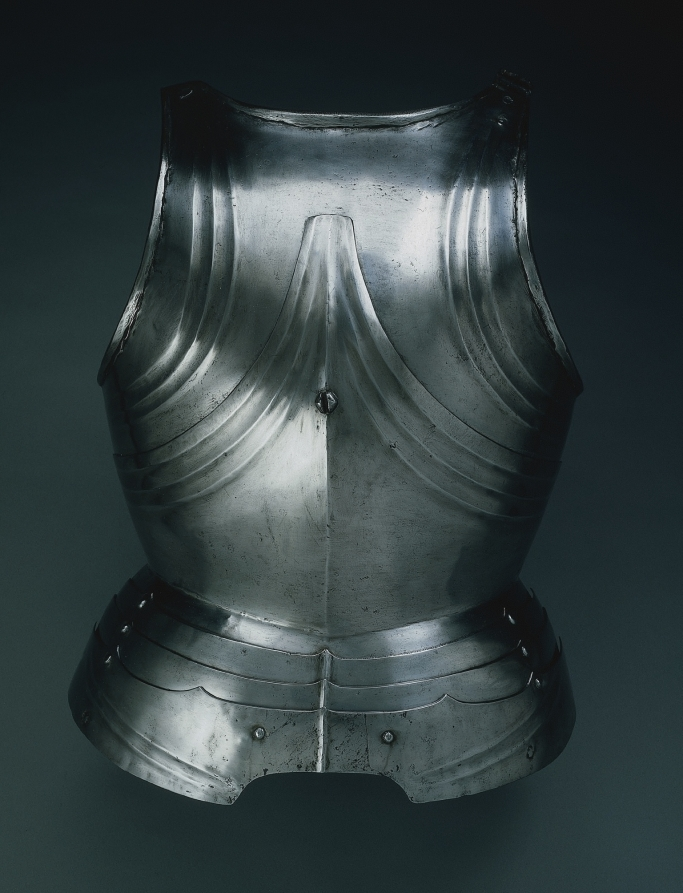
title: Gothic Breastplate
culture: South Germany or Austria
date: c. 1485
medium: steel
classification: Arms and Armor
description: Individual armor elements, like this breastplate, were shaped in ways that would make their surfaces as deflecting as possible. The contours of this breastplate, along with the pronounced vertical ridge down its center, were for precisely this purpose.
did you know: This breastplate consists of two primary plates of steel fastened at the center by a rivet.